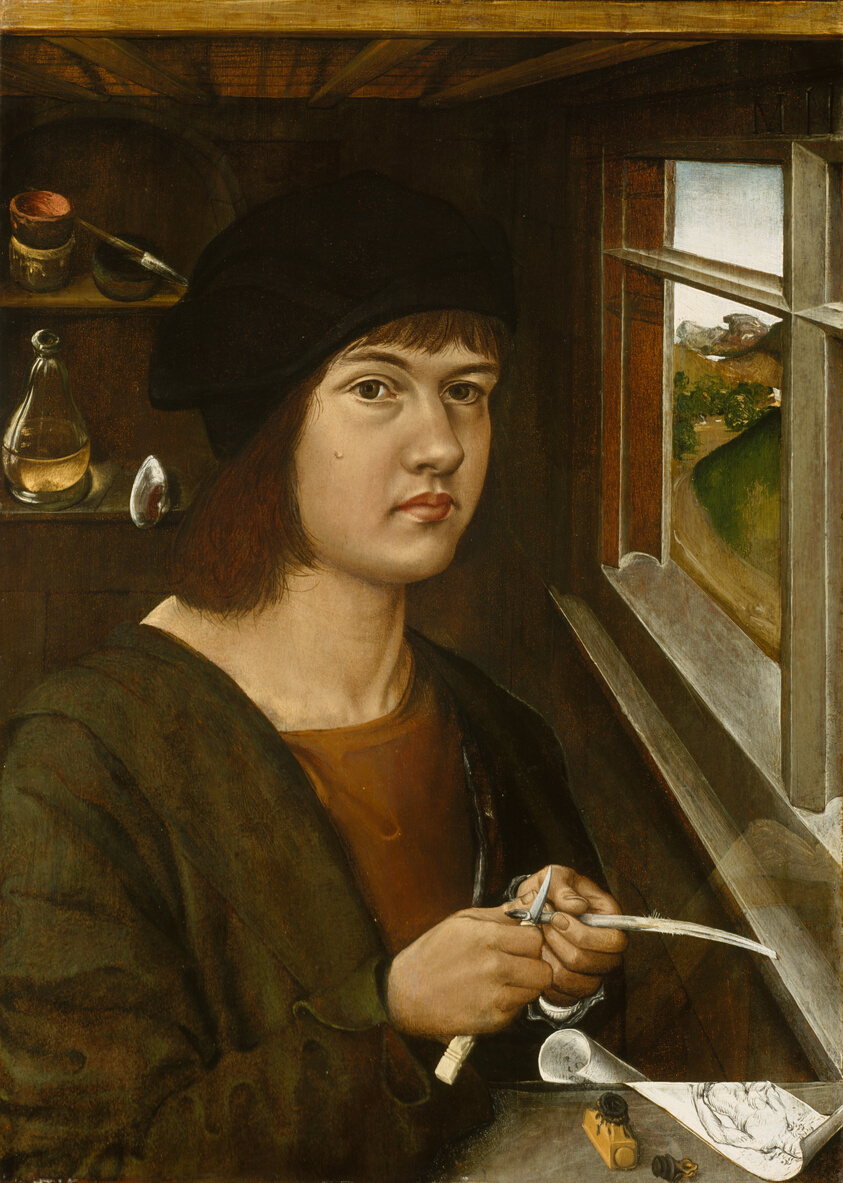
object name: Painting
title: Portrait of a Young Artist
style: 16th Century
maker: South German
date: c. 1500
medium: Oil on panel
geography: Germany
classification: oil on panel; paint; painting; european painting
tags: portraits, artist, interior, knife, landscape, man, portraits: male subject, window